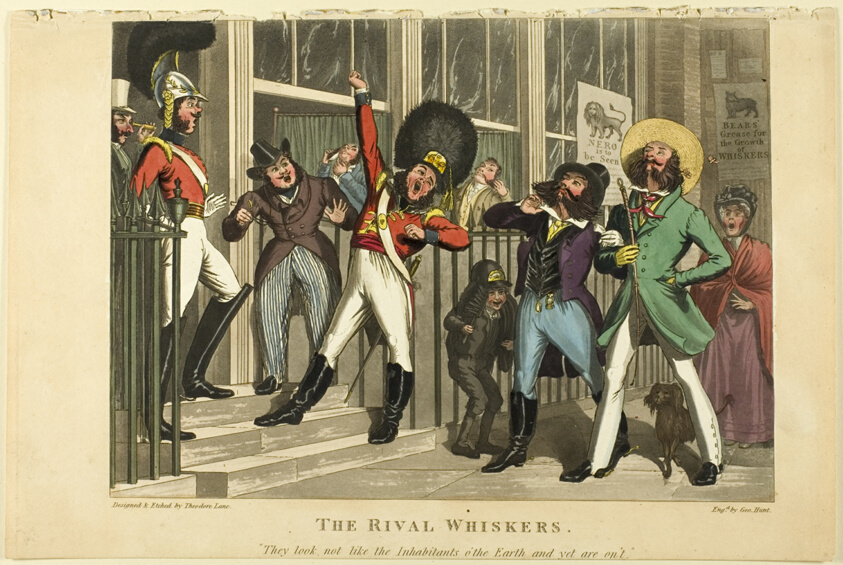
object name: Print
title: The Rival Whiskers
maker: Theodore Lane (English, 1800-1828)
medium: Etching and aquatint, with hand-coloring, on paper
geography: England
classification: etching; print; prints and drawing